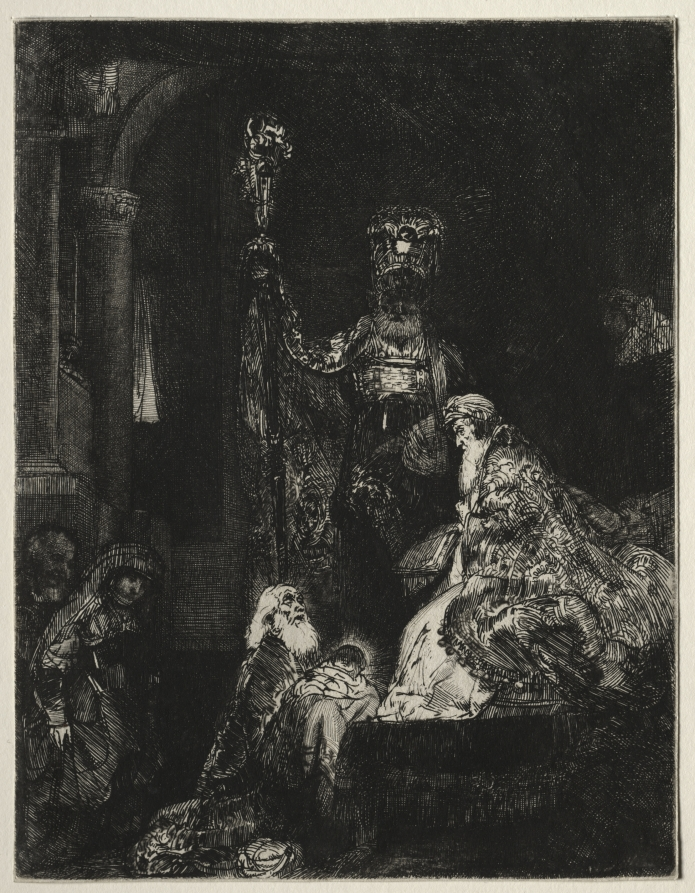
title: The Presentation in the Temple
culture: Netherlands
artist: Rembrandt van Rijn (Dutch, 1606–1669)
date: c. 1654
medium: etching, drypoint and engraving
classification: Print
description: Rembrandt often illustrated the intimate meaning of biblical events. Here Simeon, to whom "it was revealed ... by the Holy Ghost, that he should not see death before he had seen the Lord's Christ," holds up the infant Jesus toward the High Priest, a frail figure who allows the prayer book to slip from his grasp. At the left, the Virgin Mary and Joseph humbly kneel in the shadows, while a priest with an enormous crozier towers over all. To Rembrandt, light symbolized divinity and spirituality. By using an unsystematic network of fine crosshatching in the background and by varying the density of groups of parallel lines on the figures, he created an evocative atmosphere where forms emerge from shimmering half-lights. Rembrandt's ability to create a rich pictorial effect with linear means can only be fully appreciated in superb impressions such as this one, where the drypoint accents are fresh and strong and the nuances of the shading are perfectly realized.